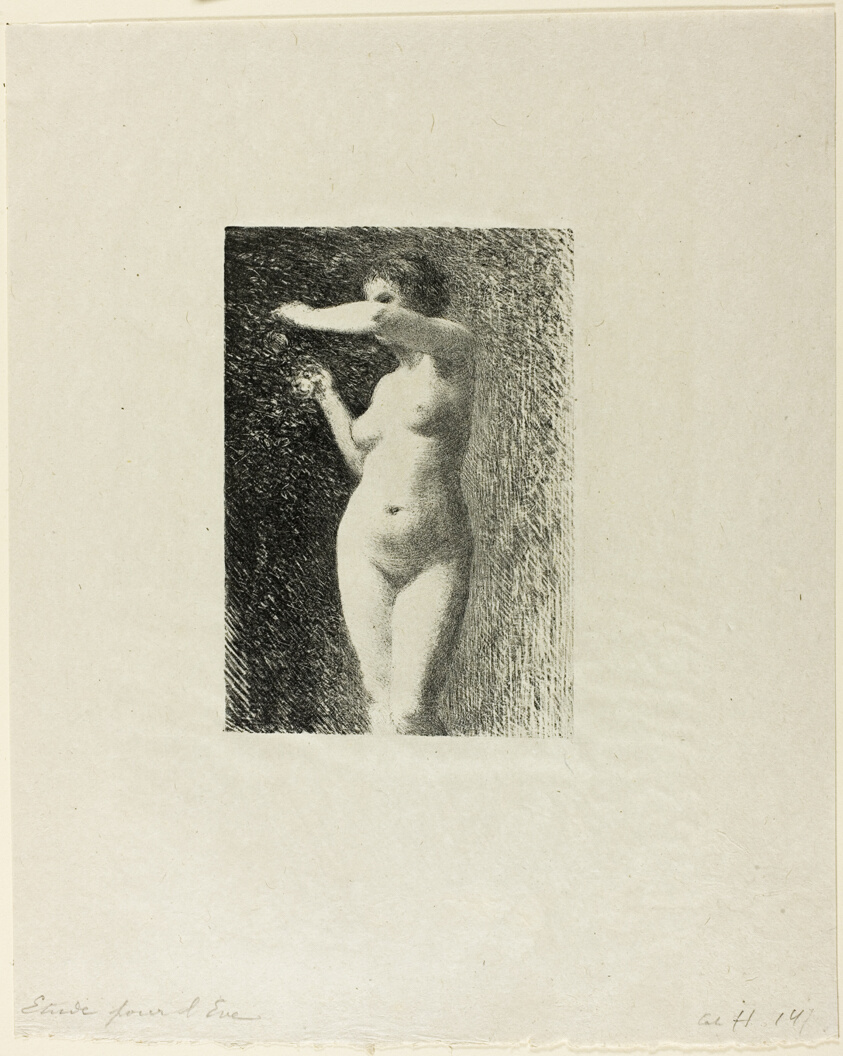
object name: Print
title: Etude for Eve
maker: Henri Fantin-Latour (French, 1836-1904)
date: 1898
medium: Lithograph in black on light gray chine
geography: France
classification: lithograph; print; prints and drawing